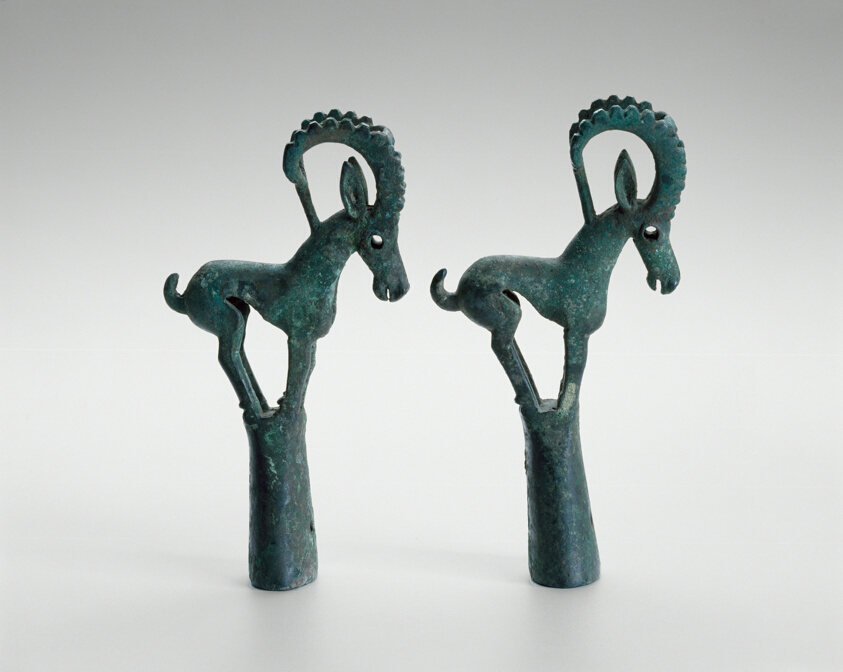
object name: Metalwork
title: Pole Top with Ibex (one of pair)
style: Chinese (culture or style)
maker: Northern China or Eurasian Steppes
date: 6th/4th century B.C.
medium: Bronze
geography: Northern China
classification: bronze; metal; decorative object/ornament; asian art; metalwork